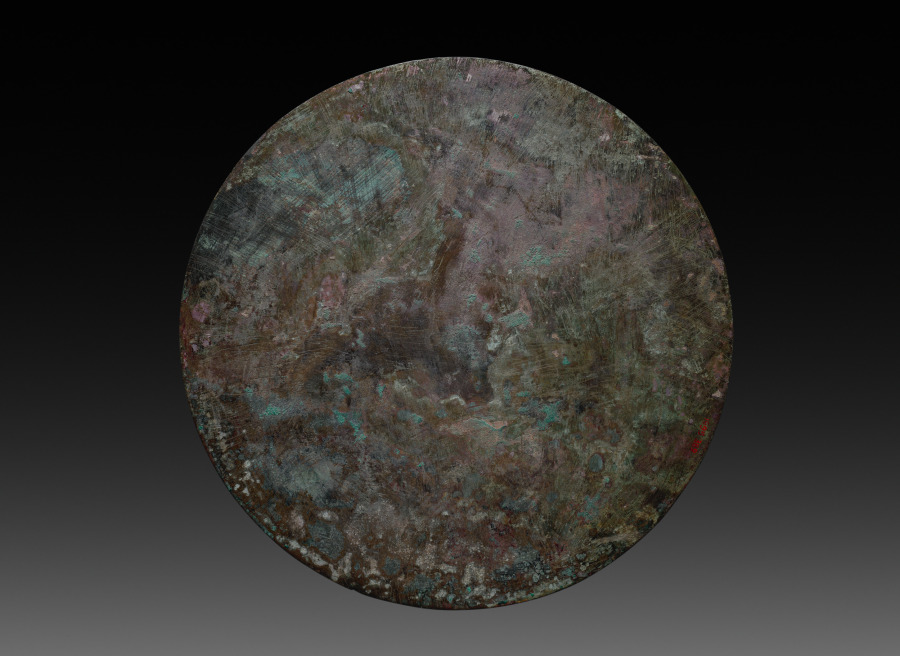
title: Mirror with a Pair of Phoenixes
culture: China, Song dynasty (960–1279)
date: 1100s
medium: bronze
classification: Metalwork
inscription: Zhang Zigao from Jinling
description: This exceptionally large bronze mirror features magnificently long-tailed phoenixes with cloud scrolls, motifs that can also be seen on the silk boots nearby. While the mirror, according to its inscription Zhang Zhigao from Jinling (Nanjing) was made in southeast China, the boots were made in the northern part of China then occupied by the Khitan people. The inscription is placed to the right of the mirror’s central knob. Mirrors typically have one polished and one decorated side and were used in part in tombs for ritual purpose or served as disks for reflection.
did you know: A union of male and female birds, the phoenix often symbolizes the yin and yang of Chinese philosophy, which equates to universal balance and harmony.